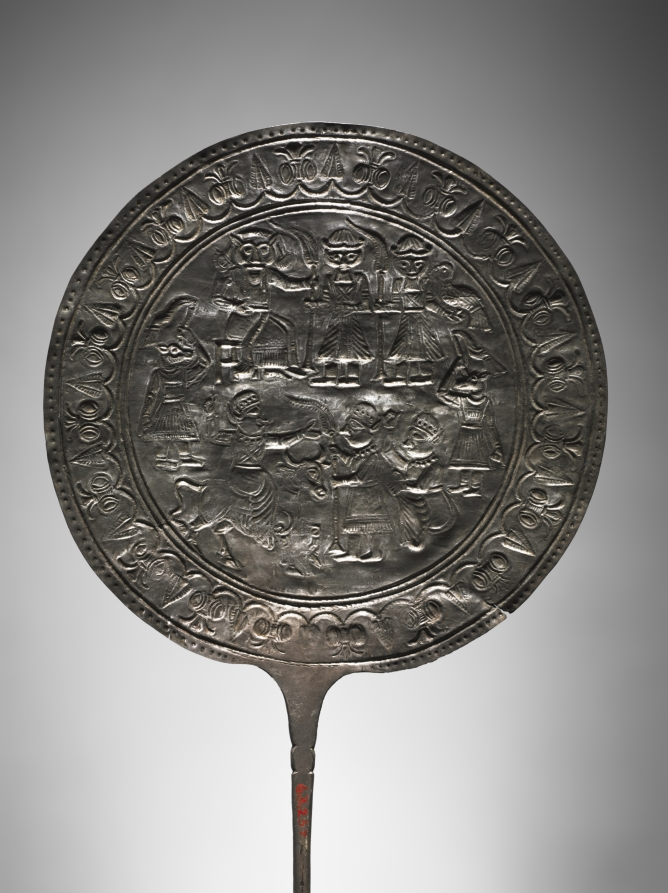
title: Votive Pin with Decorated Disc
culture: Iran, Luristan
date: 800–600 BCE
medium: silver, repoussé and incised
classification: Metalwork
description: A complex mythological scene unfolds on the decorative disc of this silver pin. On the top register, two bearded figures carrying palm fronds and a bird extend a frond to a seated lion-headed man. Below, two figures holding fronds approach a man riding a bull. Two animal-headed beings flank the registers and perhaps hold banners in their hands. A pattern of stylized lotus buds and blossoms decorates the disk’s rim. The scene may represent a Mesopotamian or Iranian myth. The pin was made with the repoussé technique by hammering designs into the back.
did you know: Luristan votive pins were sometimes found pushed into the walls of religious sanctuaries.